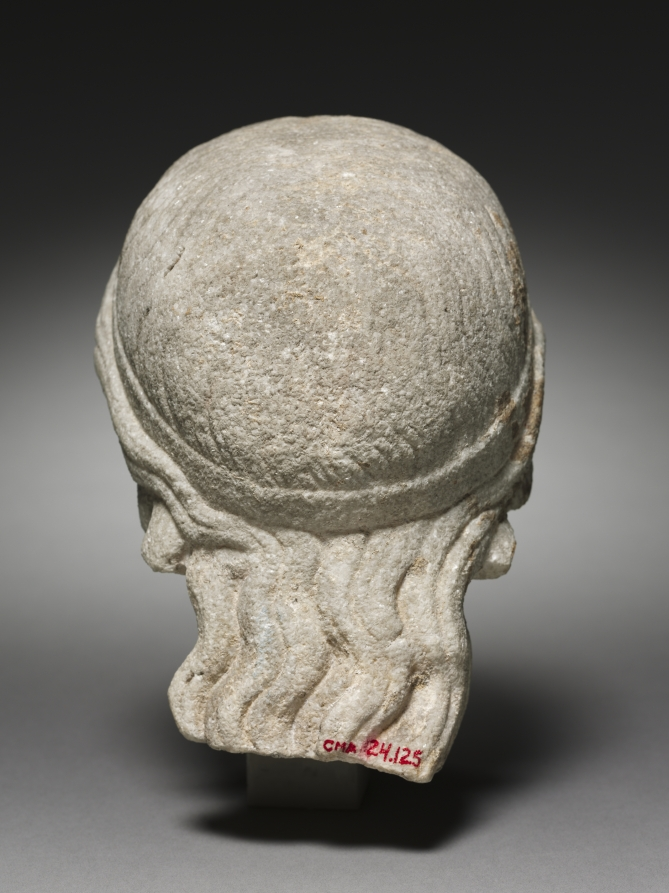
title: Idealized Head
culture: Italy, Roman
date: 50 BCE–100 CE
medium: dolomite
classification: Sculpture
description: This head combines an idealizing style with the serene expression that was characteristic of early Classical sculpture in Greece. Though copies of Greek masterpieces were popular in Rome during the late Republic and early empire, Romans also created many new sculptures that emulated the Classical style, which they felt conveyed a sense of the divine. This statue was probably one such piece, borrowing iconographically and stylistically from various Greek examples.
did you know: This head could represent a woman or goddess, or a youthful god such as Apollo.